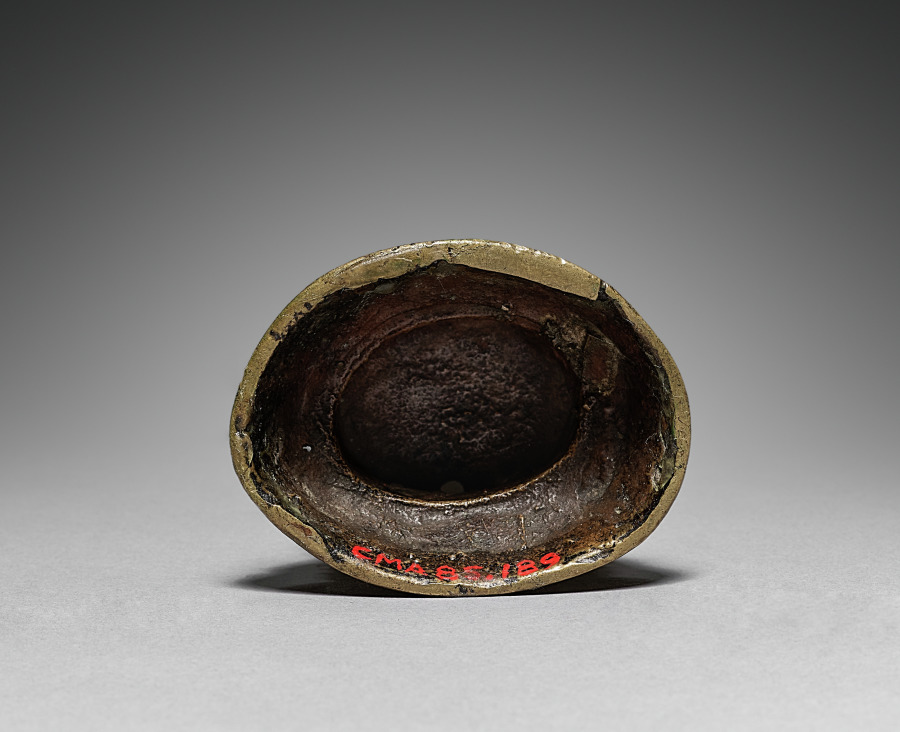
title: Standing Manjusri (Arapacana Form)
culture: India, Pala, 12th-13th century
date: 1100s-1200s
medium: bronze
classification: Sculpture